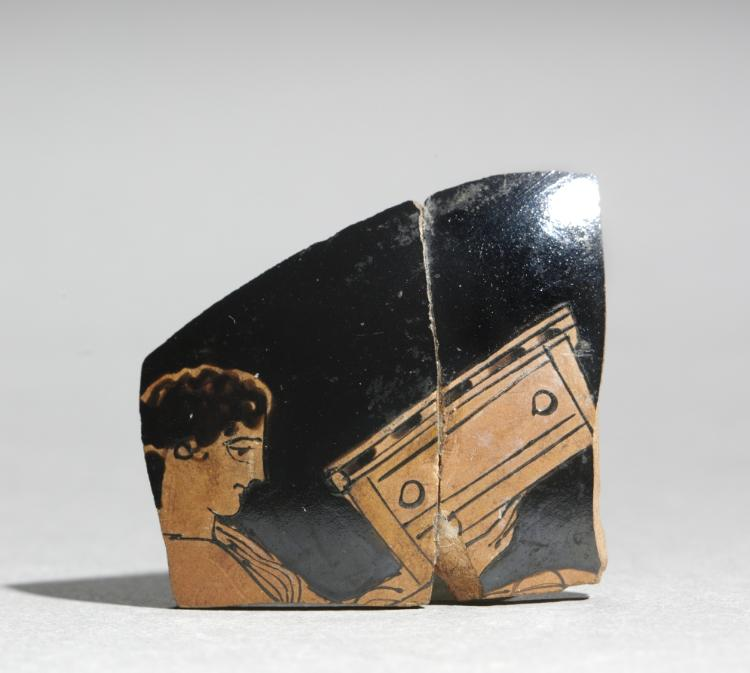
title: Fragment from Red-Figure Oinochoe (Wine Jug) or Hydria (Water Jar): Woman Holding Box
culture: Greek, Attic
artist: attributed to Shuvalov Painter (Greek, Attic, active c. 440–410 BCE)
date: c. 425–420 BCE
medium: ceramic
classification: Ceramic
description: The relatively large eyes and head of this seated woman are characteristic of figures painted by the Shuvalov Painter, a painter known to have painted numerous small vases during the mid- to late fifth century BC. Along with many mythological subjects, the Shuvalov Painter often showed women in domestic settings, as here; the box or chest she holds could be a bridal gift.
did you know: The Shuvalov Painter is named after the former owner of an amphora now in the Hermitage.